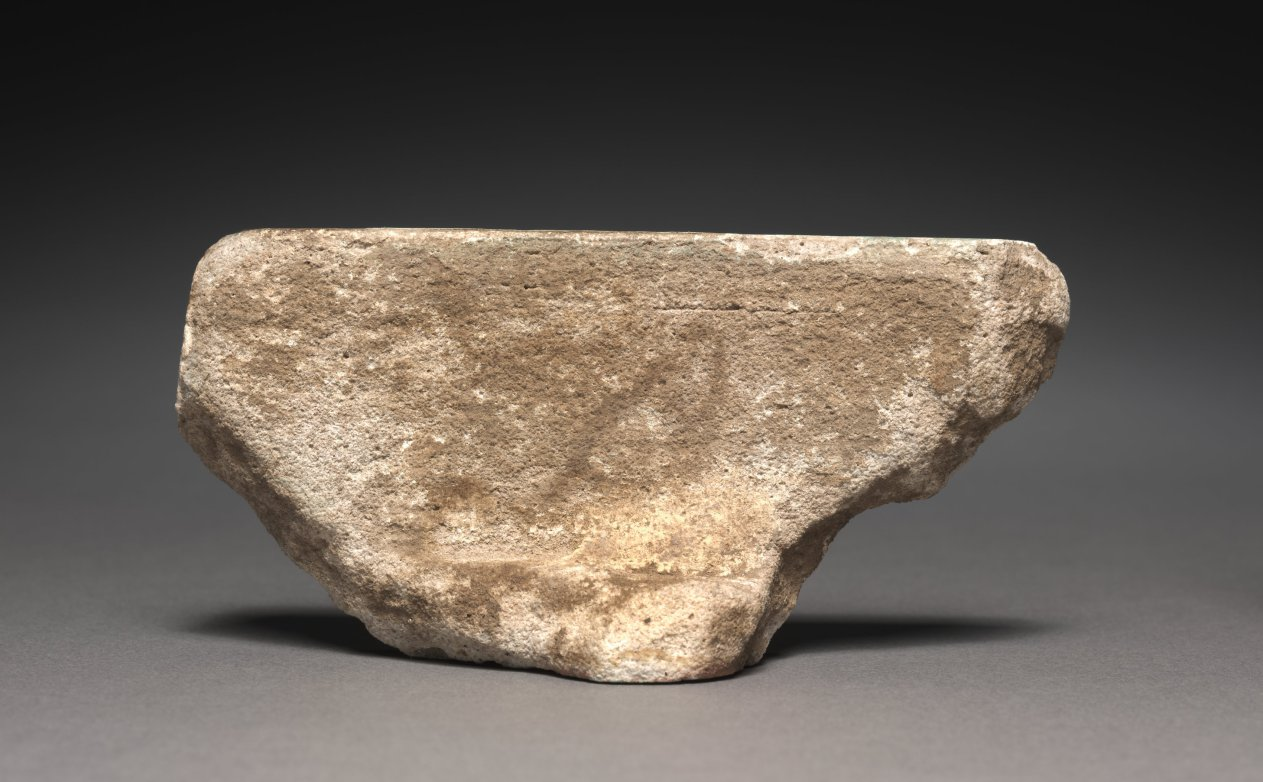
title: Fragment of Statue Base (?)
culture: Egypt, New Kingdom (1540–1069 BCE)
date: 1540–1069 BCE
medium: turquoise faience with purple-black painted decoration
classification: Sculpture